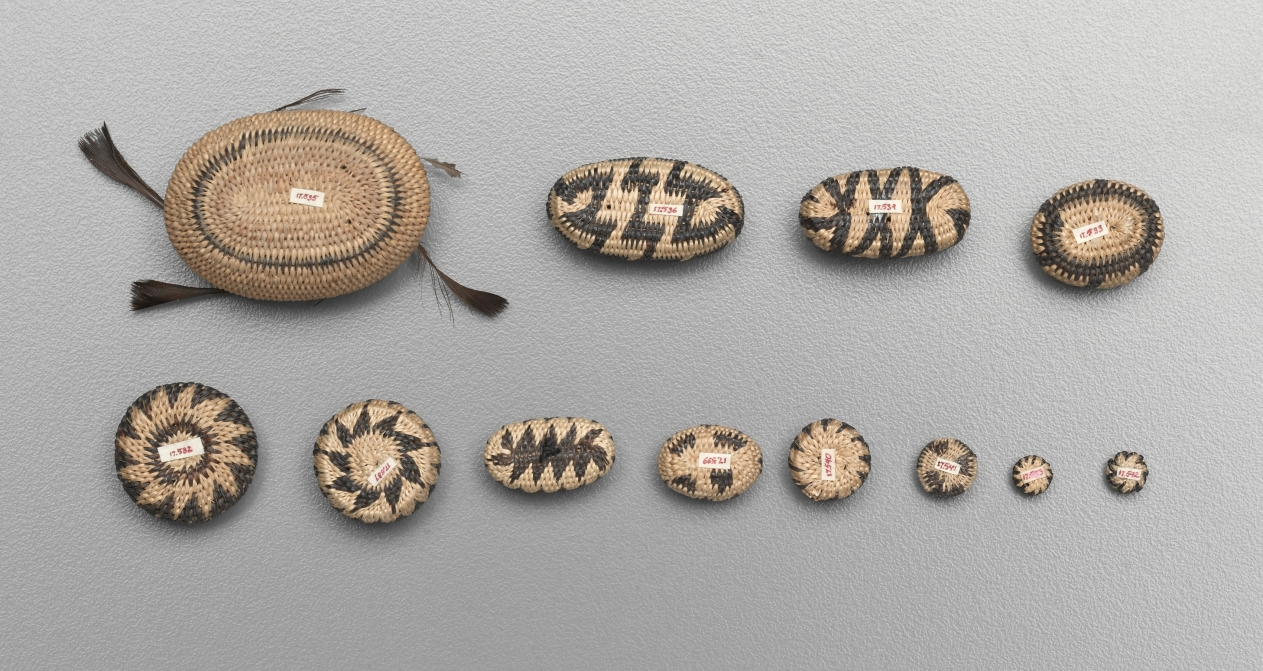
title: Miniature Rhomboidal Basket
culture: California, Pomo, 20th century (?)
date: Early 1900s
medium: coiled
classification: Basketry